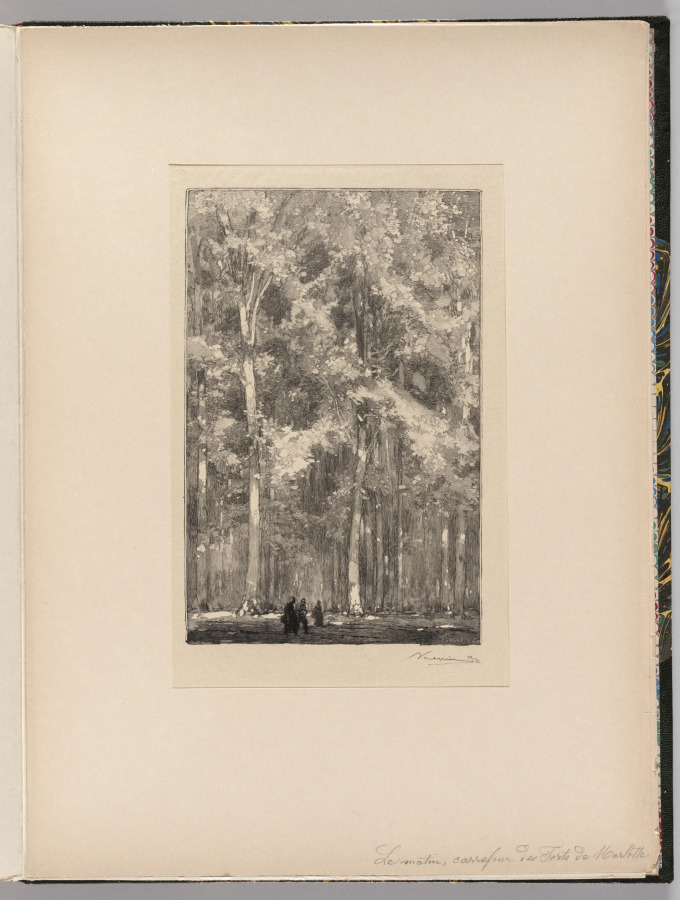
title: Fontainebleau Forest: Morning, Crossroads of the Route of the Forts de Marlotte (La Forêt de Fontainebleau: Le Matin, Carrefour des Fort de Marlotte)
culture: France, 19th century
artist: Auguste Louis Lepère (French, 1849–1918)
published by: A. Desmoulins, Published in Revue Illustrée, 1887–90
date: 1890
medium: wood engraving from bound volume of 34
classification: Bound Volume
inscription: On block, lower right: A LEPERE; below image, lower right, in black ink: ALepère 22/35; on window mat, lower right, in graphite: Le matin, carrefour des Fort de Marlotte